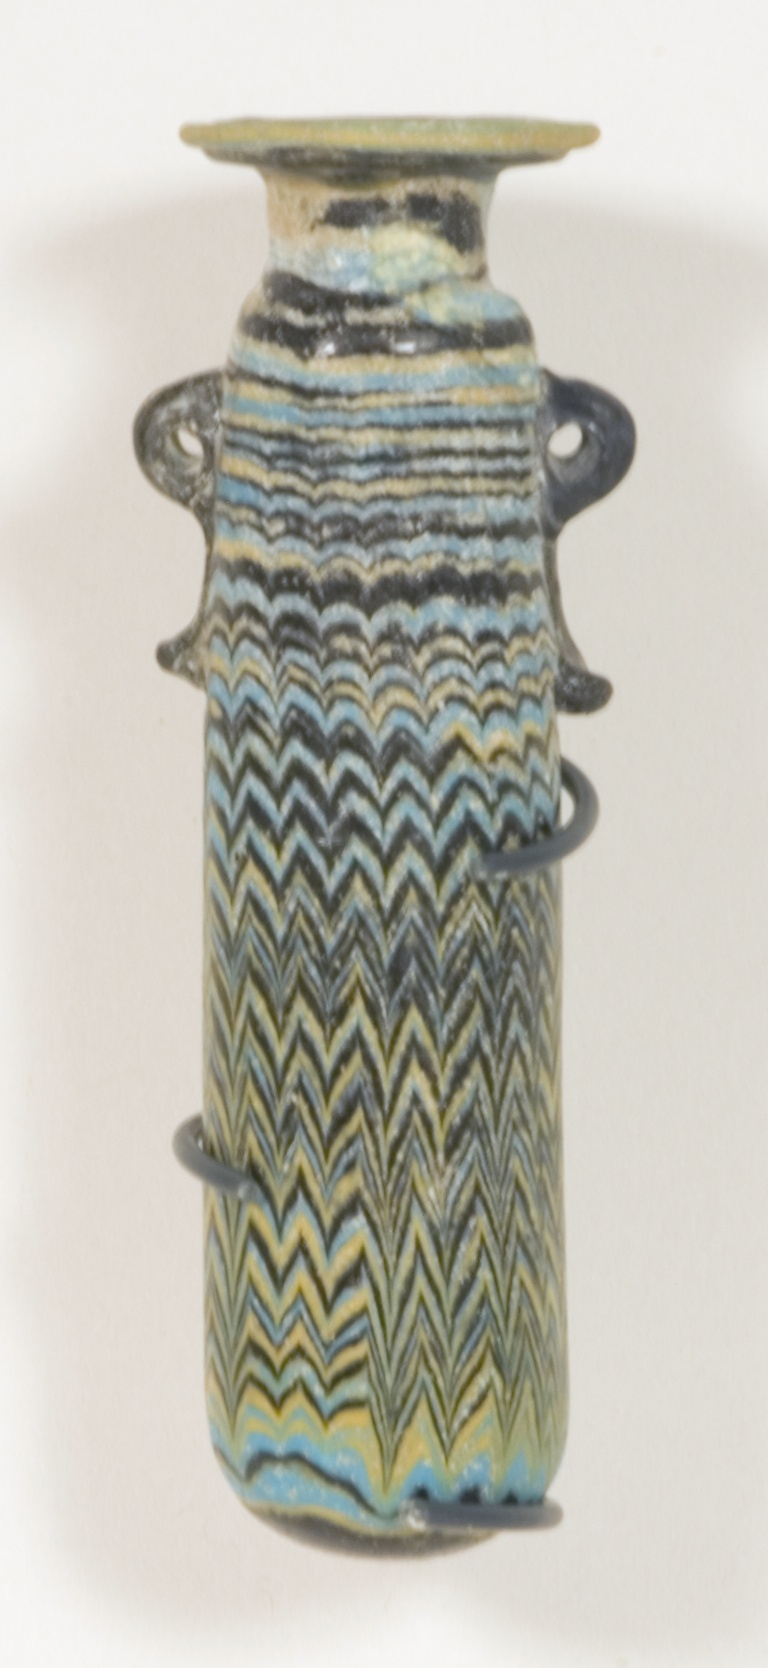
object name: Vessel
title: Alabastron (Container for Scented Oil)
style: ancient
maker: Eastern Mediterranean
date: late 6th-early 3rd century BCE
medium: Glass, core-formed technique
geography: North Africa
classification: container; alabastron; glass; vessel; ancient art